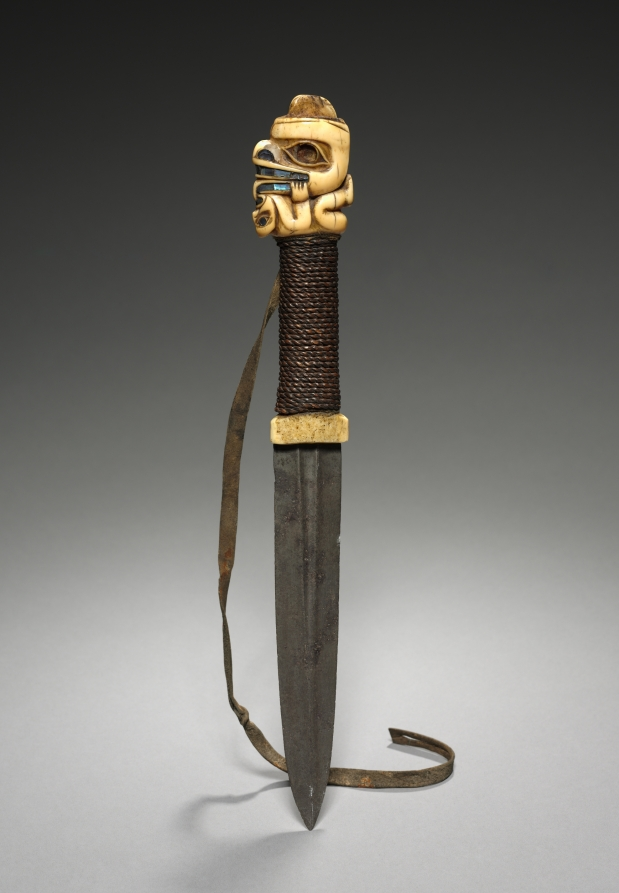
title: Dagger (Gwálaa)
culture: Native North America, Northwest Coast, Alaska, Tlingit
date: late 1800s–early 1900s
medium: ivory, fiber, leather, metal (steel), shell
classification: Arms and Armor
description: After Europeans introduced firearms, the Indigenous Northwest Coast dagger transformed from a weapon into a status symbol worn in a sheath that hung from the neck. That may be the case with this example, which depicts a bear’s head over a supine human.